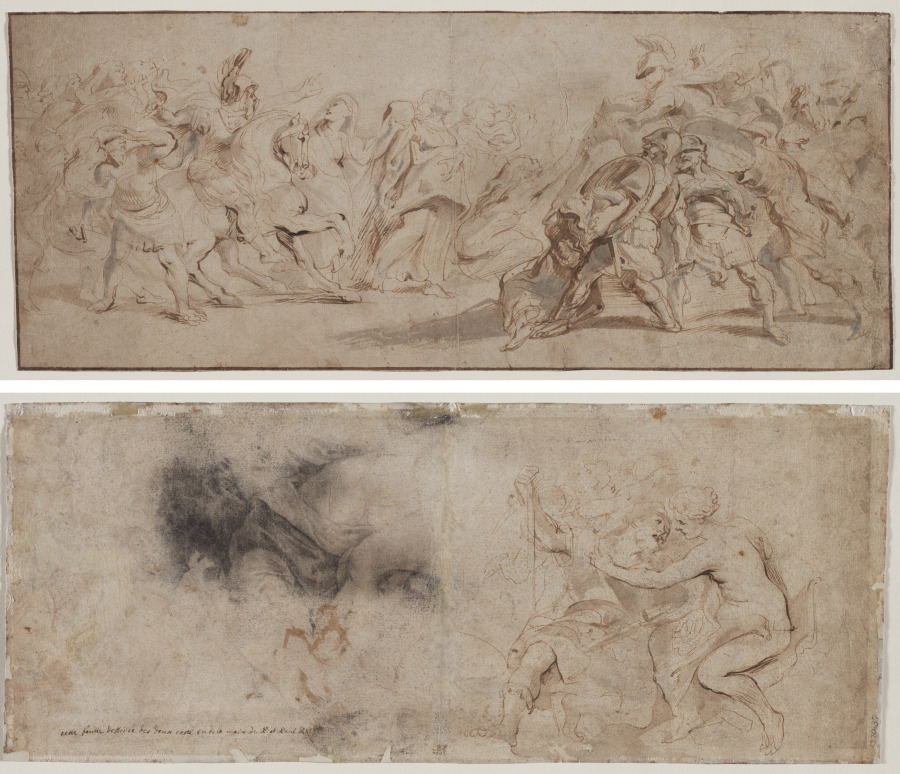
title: Reconciliation of the Romans and the Sabines (recto) Venus Disarming Mars, Drapery Study (verso)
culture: Flanders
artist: Peter Paul Rubens (Flemish, 1577–1640)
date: c. 1632/35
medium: pen and brown ink and brush and gray and brown wash; framing lines in brown ink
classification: Drawing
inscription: ON AN OLD SUPPORT (now removed): in graphite: 200 x 489 mm ; in graphite: Rubens [JUS ?] ; stamped in red ink: ZOLL / I-26 / + [circled] (according to departmental cataloging sheet this is a Swiss customs stamp) ; ON AN OLD SUPPORT (now removed): embosed in red ink: P.P. Rubens ; ON OLD BACKING? (now removed): in blue ink: Versöhnung der Römer und Sabiner / auf der Rückseite: Venus entwaffnen Mars / ausst. von Rubens zeichnungen, / antwerpen, Rubenshaus sommer 1956 No 117 ; in graphite: Royal accademy, winter exhibition 1953/4